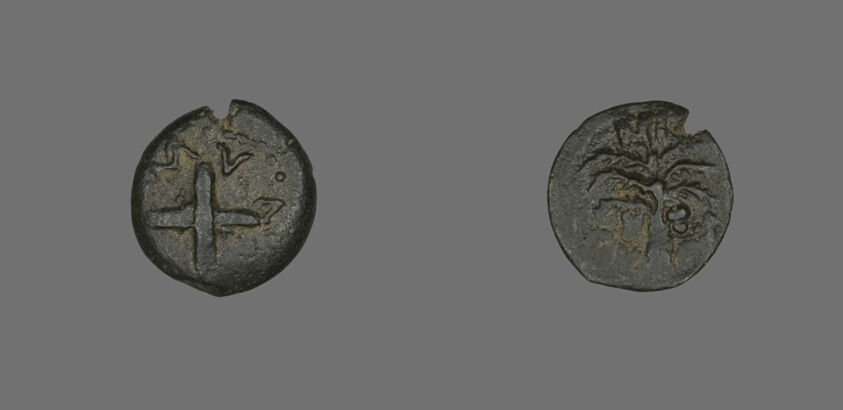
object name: Coin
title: Coin Depicting Shields and Spears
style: ancient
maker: Roman, Palestine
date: 54, Procurator: Antonius Felix (reign of Claudius)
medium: Bronze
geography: Israel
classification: coin; ancient art